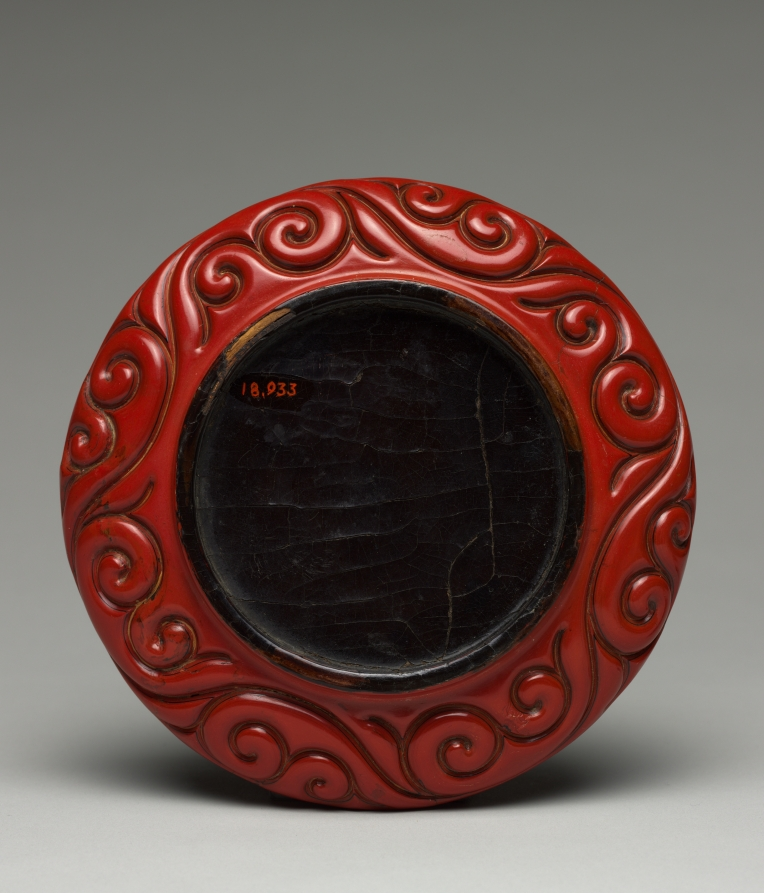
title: Lotus Dish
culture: China, Yuan dynasty (1271-1368)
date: 1271–1368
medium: Carved cinnabar-red lacquer on wood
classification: Lacquer